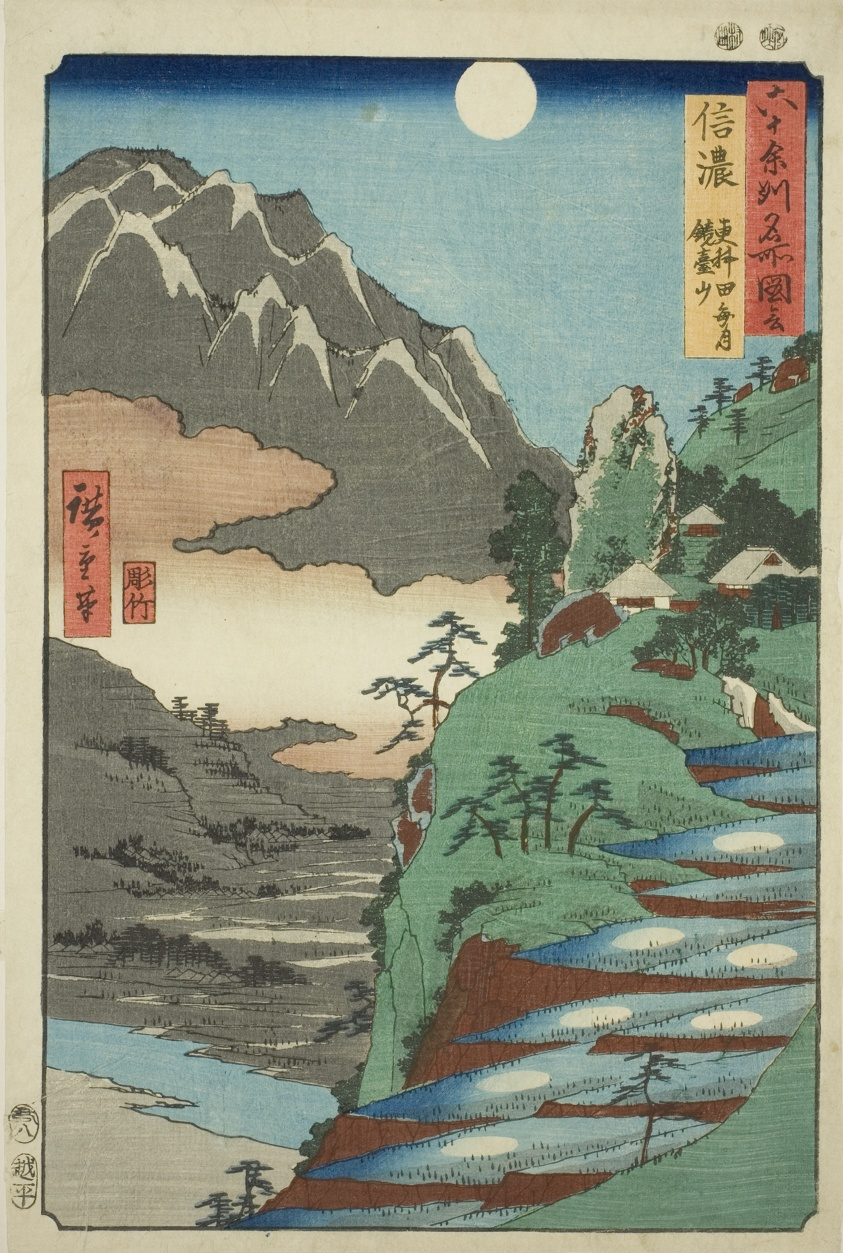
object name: Print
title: Shinano Province: The Moon Reflected in the Sarashina Rice Fields near Mount Kyodai (Shinano, Sarashina tagoto no tsuki, Kyodaisan), from the series "Famous Places in the Sixty-odd Provinces (Rokujuyoshu meisho zue)"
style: Japanese (culture or style)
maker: Utagawa Hiroshige 歌川 広重; Japanese, 1797-1858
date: 1853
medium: Color woodblock print; oban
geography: Japan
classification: woodblock print; print; asian art